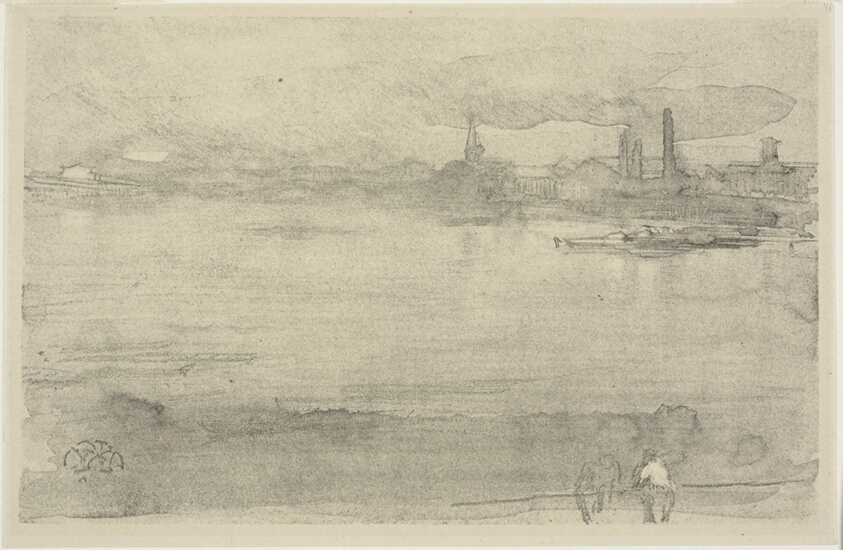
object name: Print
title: Early Morning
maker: James McNeill Whistler (American, 1834-1903)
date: 1878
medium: Lithotint with scraping, on a prepared half-tint ground, in black ink on cream wove paper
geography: United States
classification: lithotint; lithograph; print; prints and drawing; paper